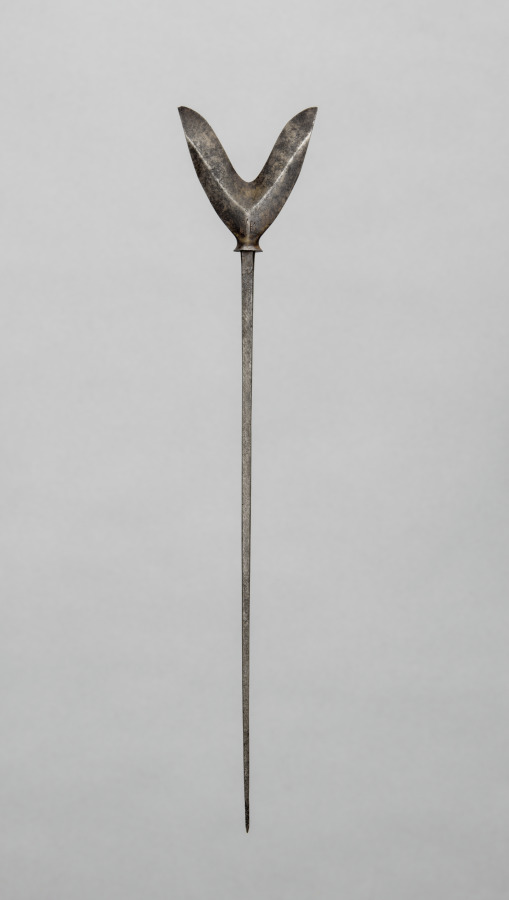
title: Arrow Point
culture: Japan, Edo period (1615–1868)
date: 1700s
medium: steel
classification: Arms and Armor